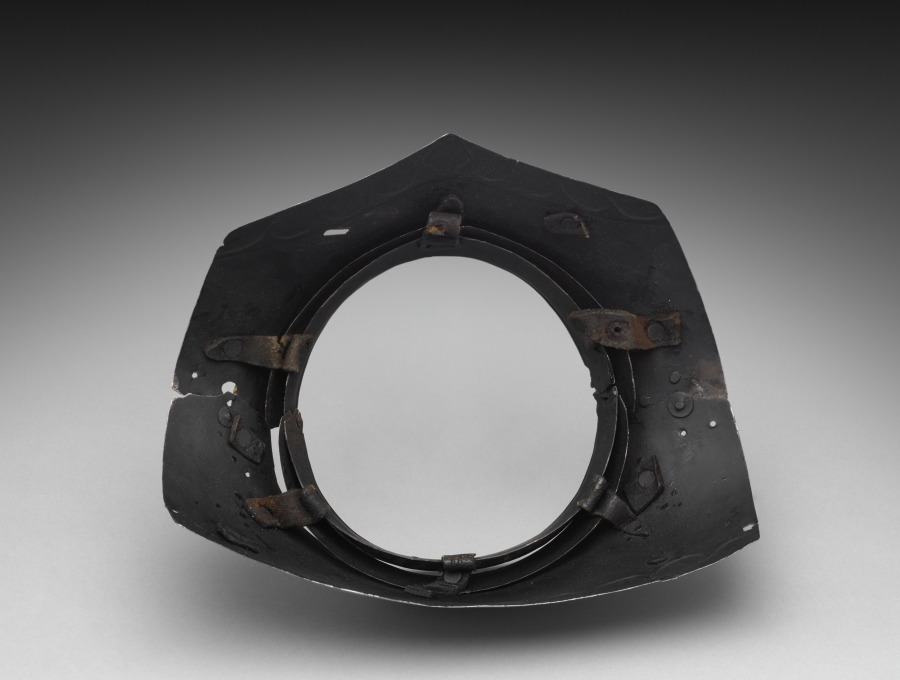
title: Gorget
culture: Germany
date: 1500s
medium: steel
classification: Arms and Armor